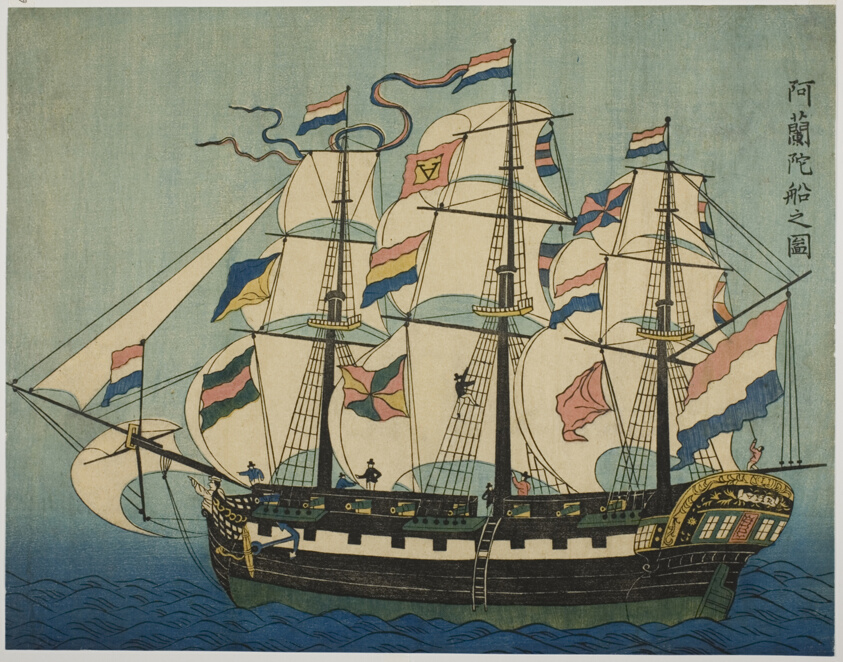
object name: Print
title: A Sketch of a Dutch Ship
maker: Unknown Artist (Japanese, date unknown)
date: 1840s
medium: Color woodblock print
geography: Japan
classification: woodblock print; print; asian art